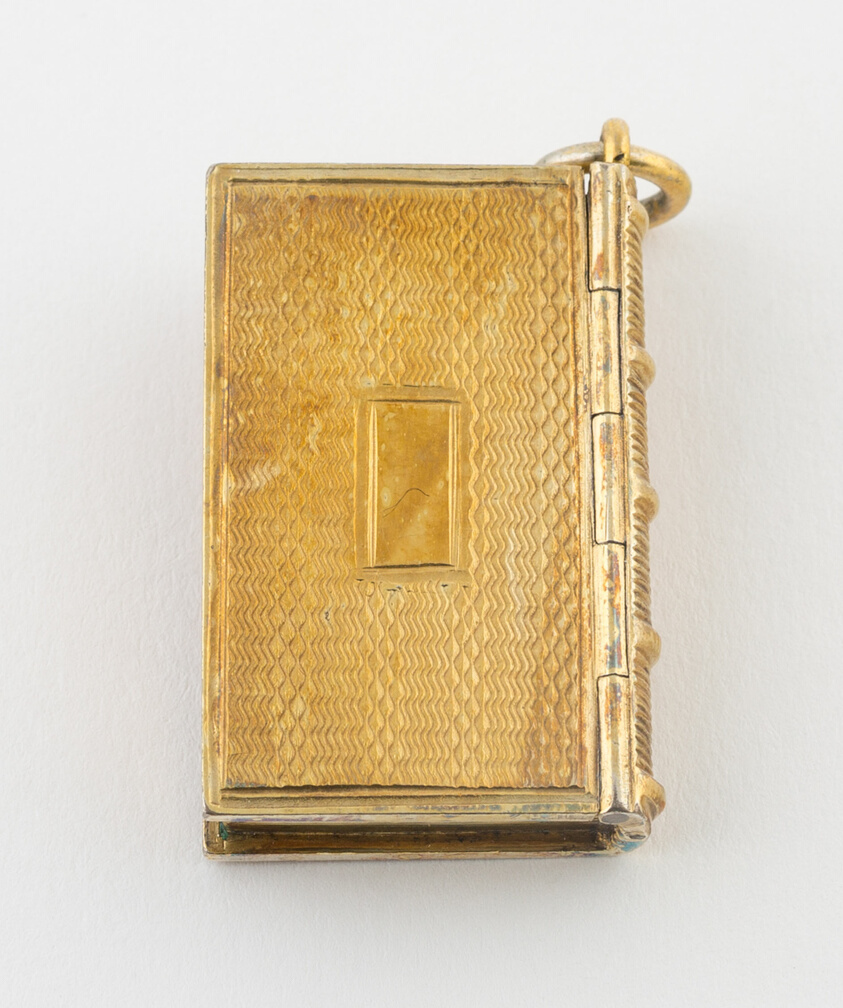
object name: Metalwork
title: Book-Shaped Vinaigrette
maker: Taylor and Perry; Birmingham, England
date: 1835/36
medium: Silver gilt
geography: Birmingham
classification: vinaigrette (container for health care); container for personal use; box; european decorative arts; metalwork; silver; decorative object/ornament